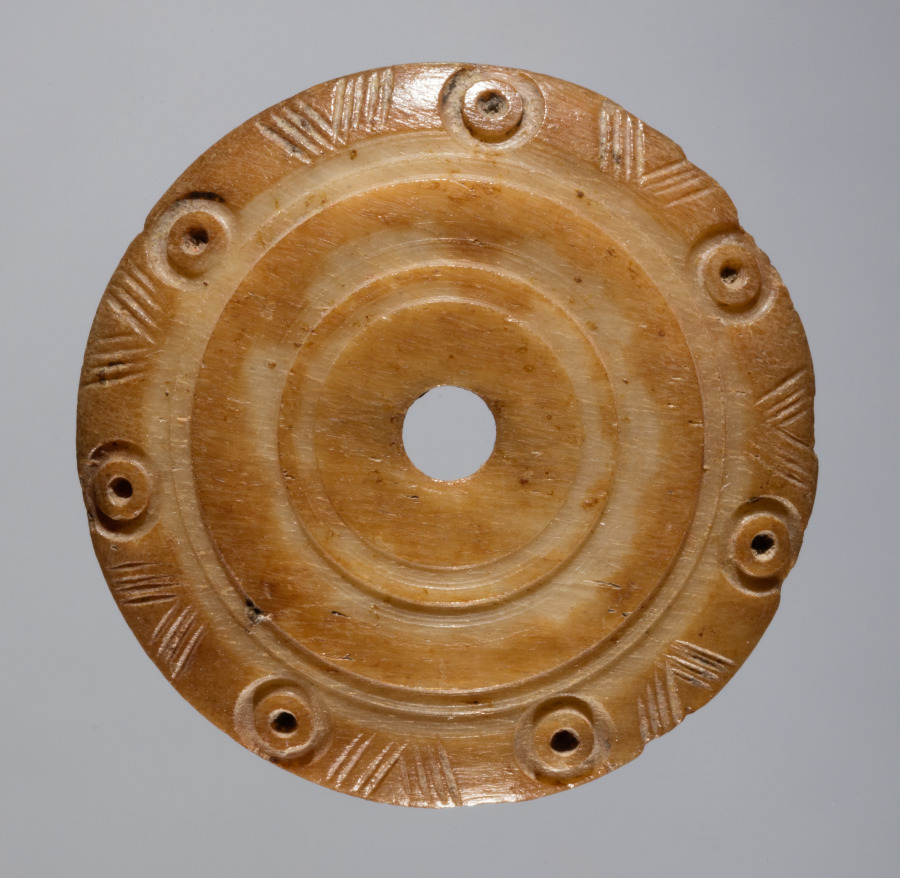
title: Spindle Whorl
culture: Iran, early Islamic period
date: 700s - 900s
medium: bone, incised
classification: Spindle Whorl